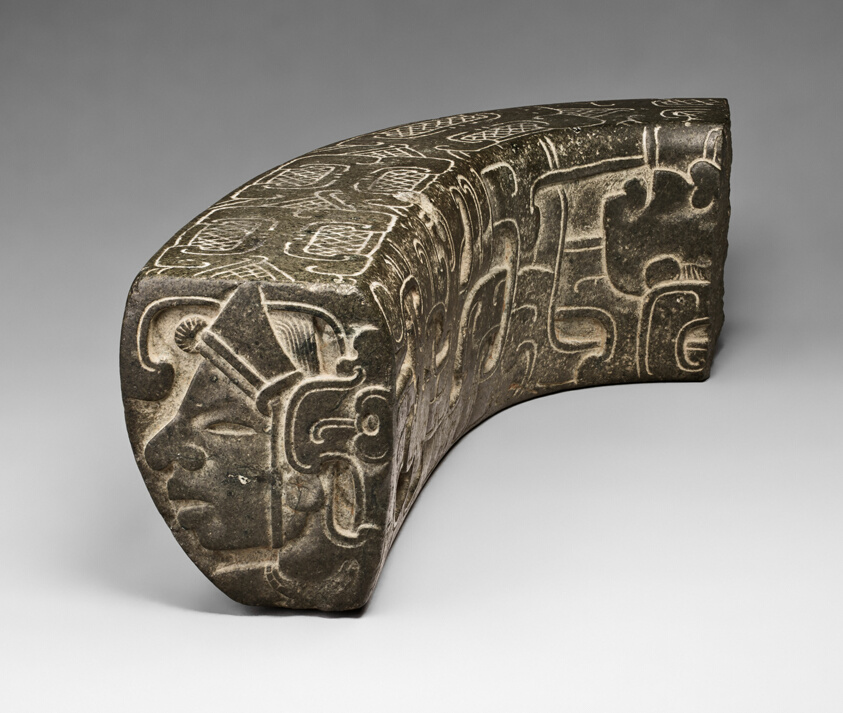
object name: Sculpture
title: Fragment of a Ceremonial Ballgame Yoke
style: totonac, tajin, classic veracruz, mesoamerican, Pre-Columbian, americas, Arts of the Americas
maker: Totonac; El Tajín and vicinity, northern Veracruz, Mexico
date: 700–800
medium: Stone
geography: El Tajín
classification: ceremonial object; stone; sculpture; art of the americas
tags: sports, scrolls (motifs), ceremony, ritual, games, abstract figures, faces, supernatural